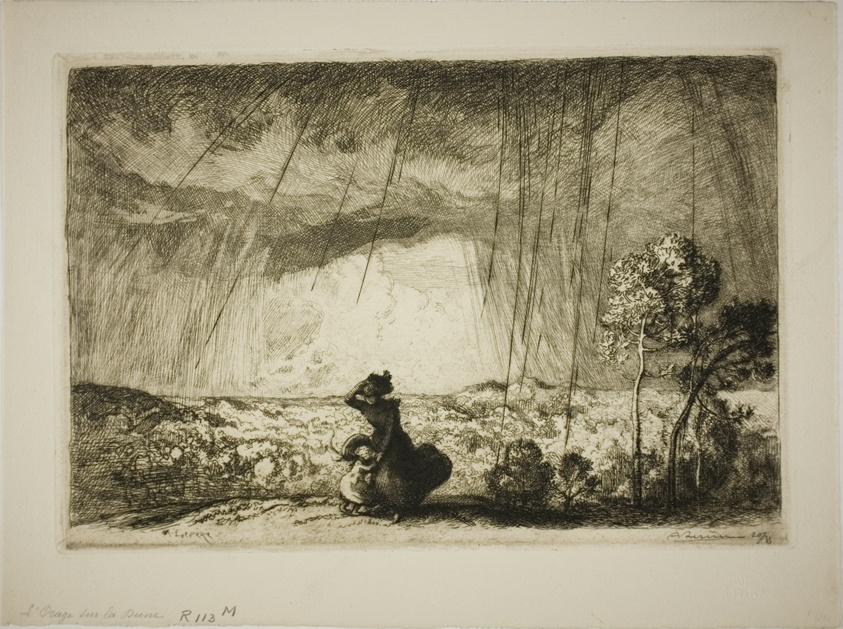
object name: Print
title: Storm on the Dune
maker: Louis Auguste Lepère (French, 1849-1918)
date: 1908–09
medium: Etching and drypoint on cream laid paper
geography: France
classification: etching; print; prints and drawing